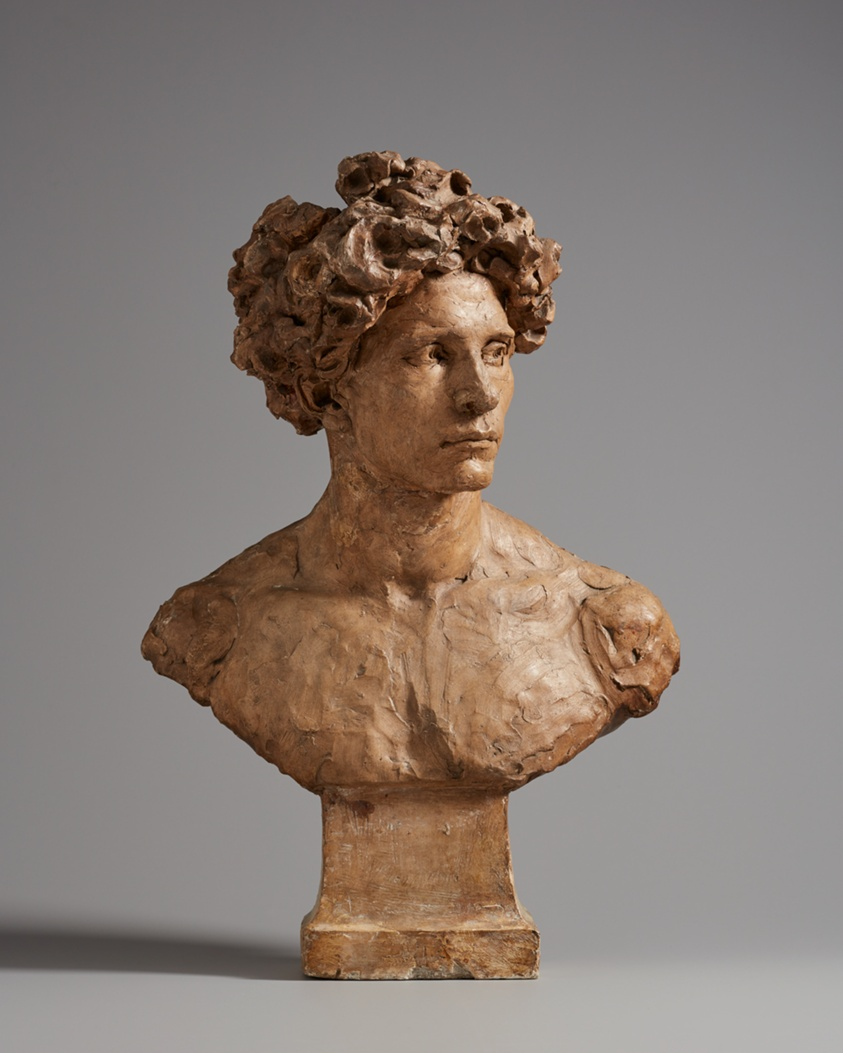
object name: Sculpture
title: Bust of a Young Man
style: nineteenth century, 19th century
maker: Aimé-Jules Dalou (French, 1838–1902)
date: 1877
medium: Patinated plaster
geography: France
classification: bust/head; sculpture; french; plaster; portrait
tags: portrait, portraits, portraits: male subject, man, busts, head